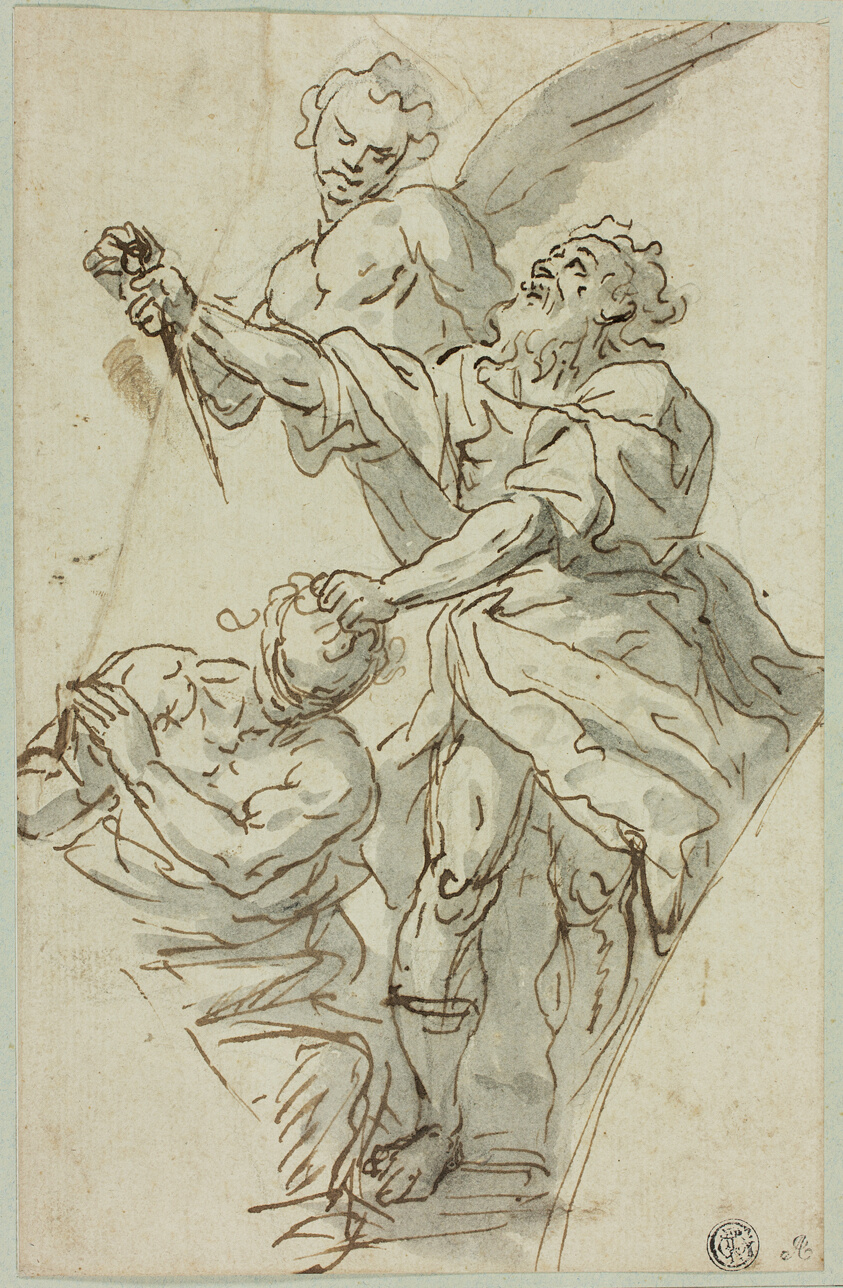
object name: Drawing and Watercolor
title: Sketch of Spandrel with Sacrifice of Isaac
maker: Attributed to Francesco de Mura; Italian, 1696-1782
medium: Pen and brown ink with brush and gray wash, over traces of black chalk, on ivory laid paper, tipped on to green wove board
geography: Italy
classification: pen and ink drawings; drawings (visual works); prints and drawing